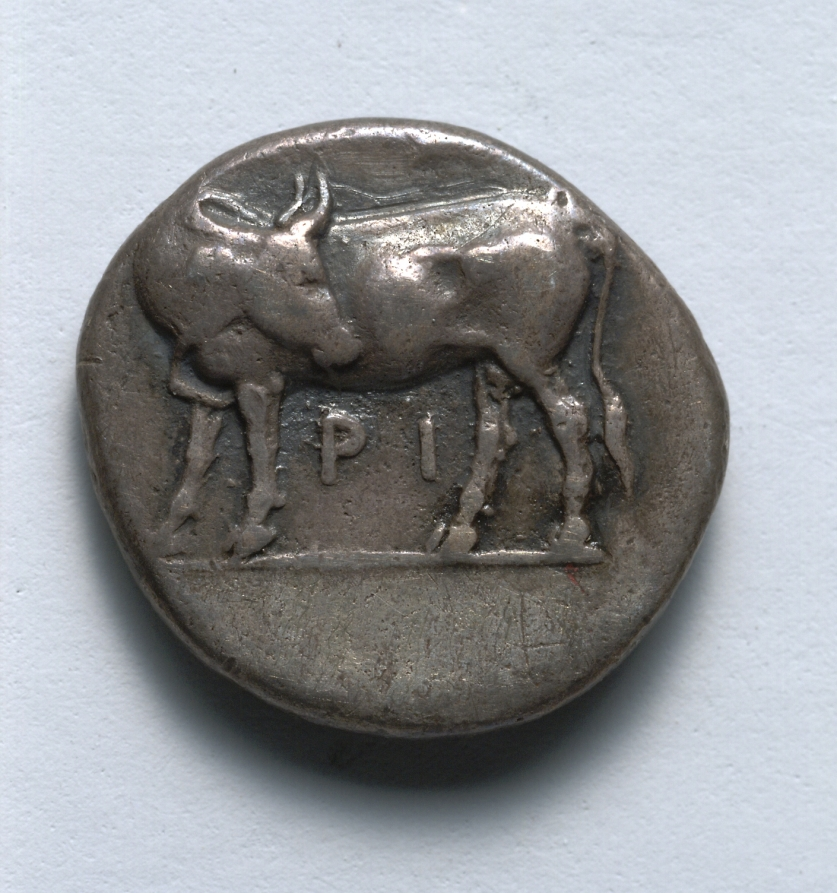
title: Hemidrachm: Bull, looking back (reverse)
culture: Greek, minted at Parion (Mysia)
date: c. 400 BCE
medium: silver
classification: Coins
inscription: [ΠΑ]ΡΙ